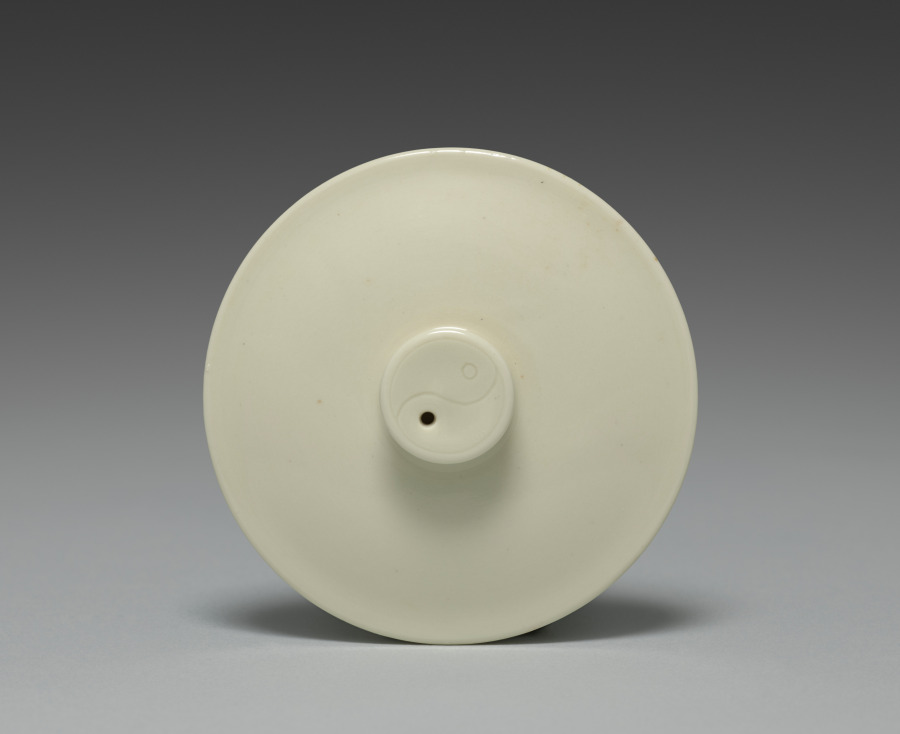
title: Lid for a Hand-held Teapot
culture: Japan, Meiji period (1868–1912)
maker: Seifū Yohei III (Japanese, 1851–1914)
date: 1893–1914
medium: Porcelain with molded and carved design and cream glaze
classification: Ceramic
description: This teapot is of a variety used by advanced sencha practitioners. Called a hōhin, the pot is designed to be held directly by the fingers, with the body touching the upper part of the palm. This shape allows the host to manipulate the pot with a single hand and demonstrate dexterity. Direct contact between the ceramic body and the hand allows the host to closely gauge the temperature of the water within. There are differing grades of sencha, and for the finest one, gyokuro, the water temperature must be carefully regulated to achieve the proper flavor. This vessel is therefore efficacious for preparing this high-quality tea. The hōhin is also extremely portable, so it is well suited for impromptu gatherings. According to its box, this teapot is an example of taihakuji. “Great-white porcelain” was an important early invention Yohei III devised in 1972. It involved the combination of a distinctive translucent, creamy glaze over an ivory-colored clay body.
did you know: This pot’s restrained design includes on the lid’s handle a yin-yang motif, symbolizing the ideal balance between the forces of the universe.